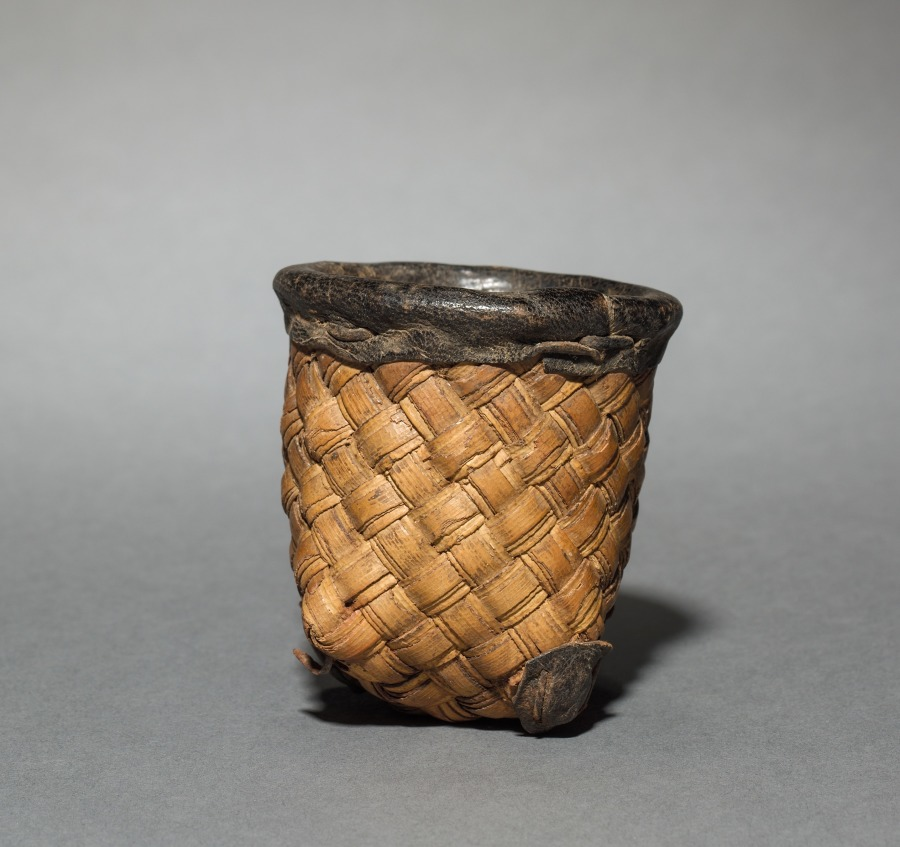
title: One of Ten Nesting Wedding Baskets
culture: Africa, Western Africa, Burkina Faso, Lobi–style maker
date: c. 1900s?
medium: Plant fiber and leather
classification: Vessels